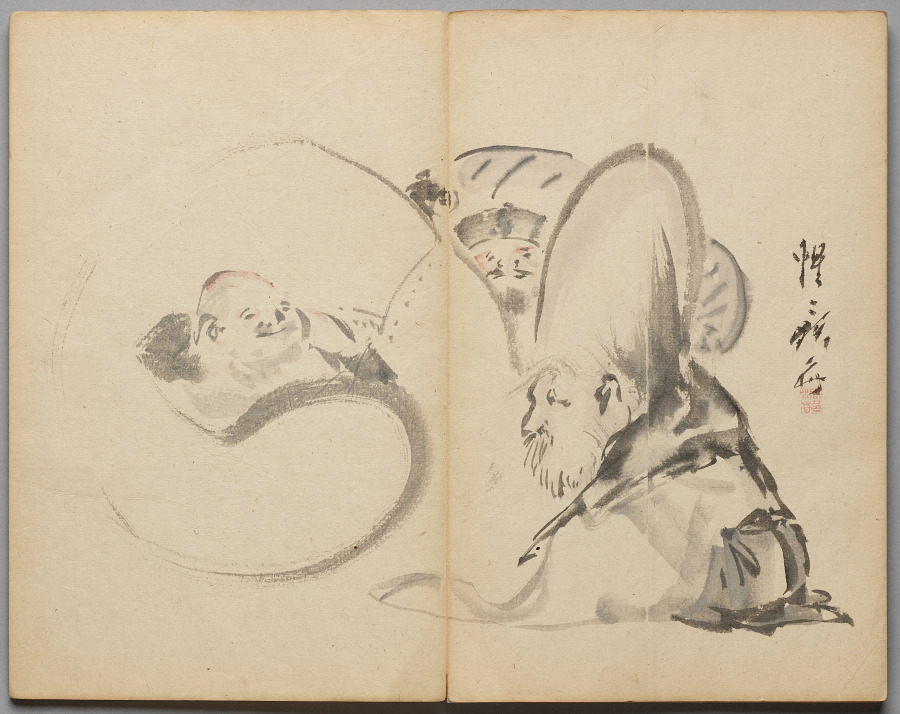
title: Gods of Good Fortune from Sketch Album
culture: Japan, Edo period (1615–1868) to Meiji period (1868–1912)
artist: Kawanabe Kyōsai (Japanese, 1831–1889)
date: mid- to late 1800s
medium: Accordion-style book of 26 double-leaves; ink and color on paper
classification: Bound Volume